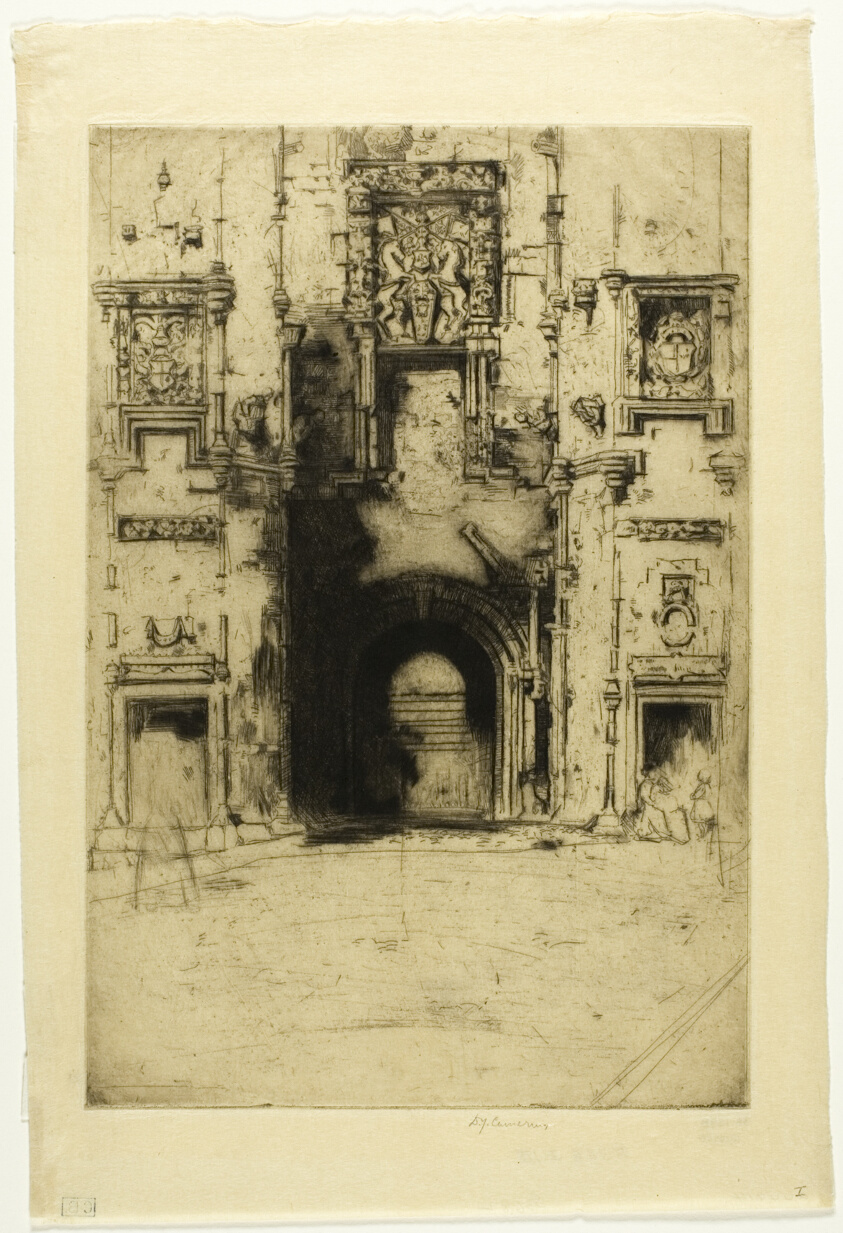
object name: Print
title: Mar's Work, Stirling. No. 2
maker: David Young Cameron (Scottish, 1865-1945)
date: 1907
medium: Etching and drypoint on ivory laid paper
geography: Scotland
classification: etching; print; prints and drawing